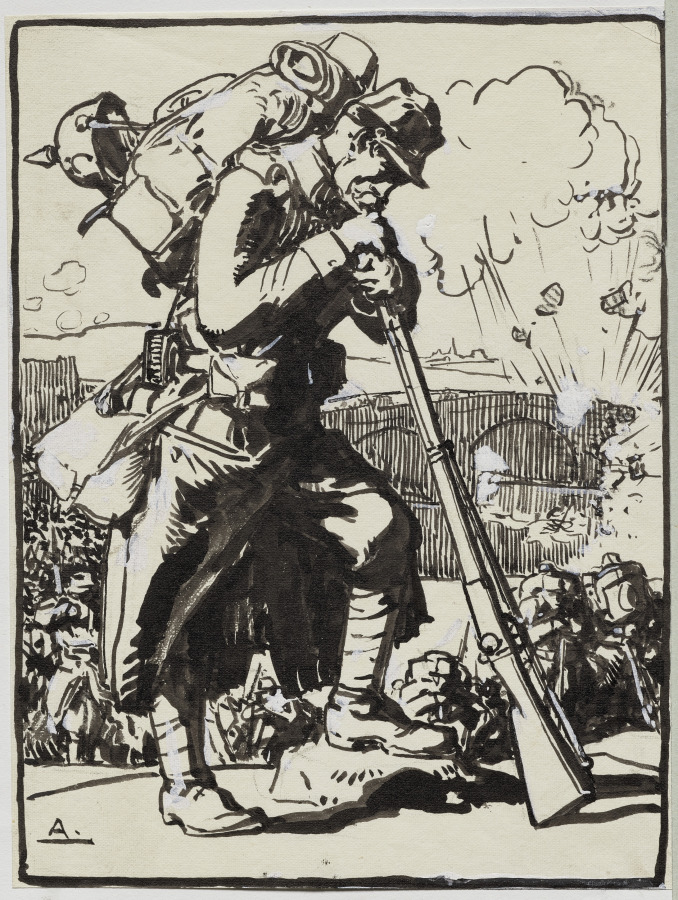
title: La Retraite après Charleroi...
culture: France, 20th century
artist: Auguste Louis Lepère (French, 1849–1918)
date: 1914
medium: pencil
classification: Drawing